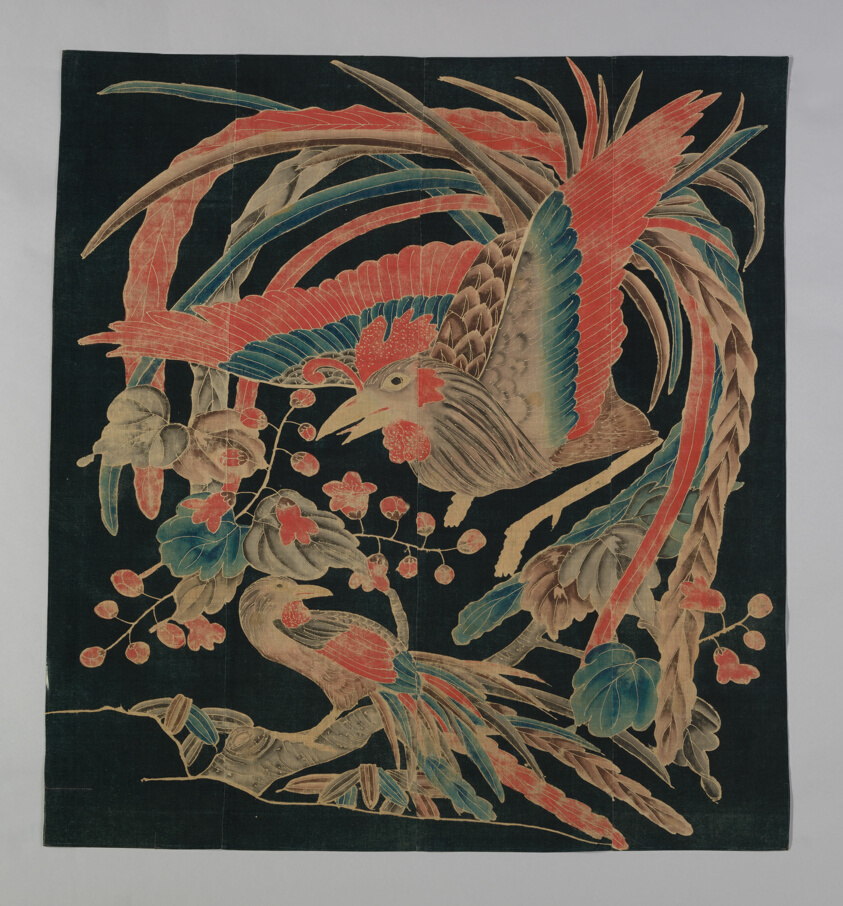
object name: Textile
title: Futon Cover (Futonji)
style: meiji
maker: Japan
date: Meiji period (1868–1912), 19th century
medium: Cotton, plain weave; hand-painted, resist dyed (tsutsugaki); four loom widths joined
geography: Japan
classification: textile; weaving - printed; printed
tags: phoenix (mythical animal), birds, mythology